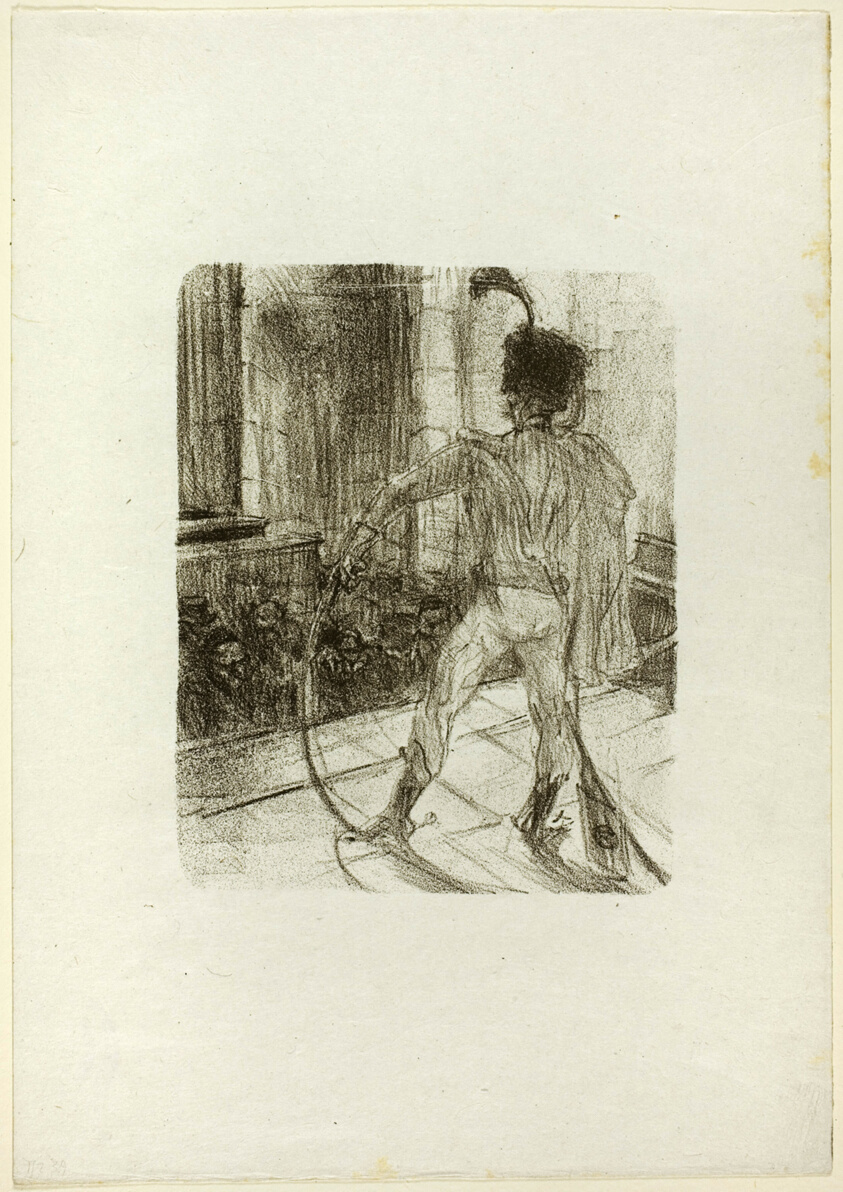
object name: Print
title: Schlomé Fuss in the Synagogue, from Au Pied du Sinaï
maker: Henri de Toulouse-Lautrec (French, 1864-1901)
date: 1897, published 1898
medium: Lithograph on ivory wove paper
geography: France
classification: lithograph; print; prints and drawing